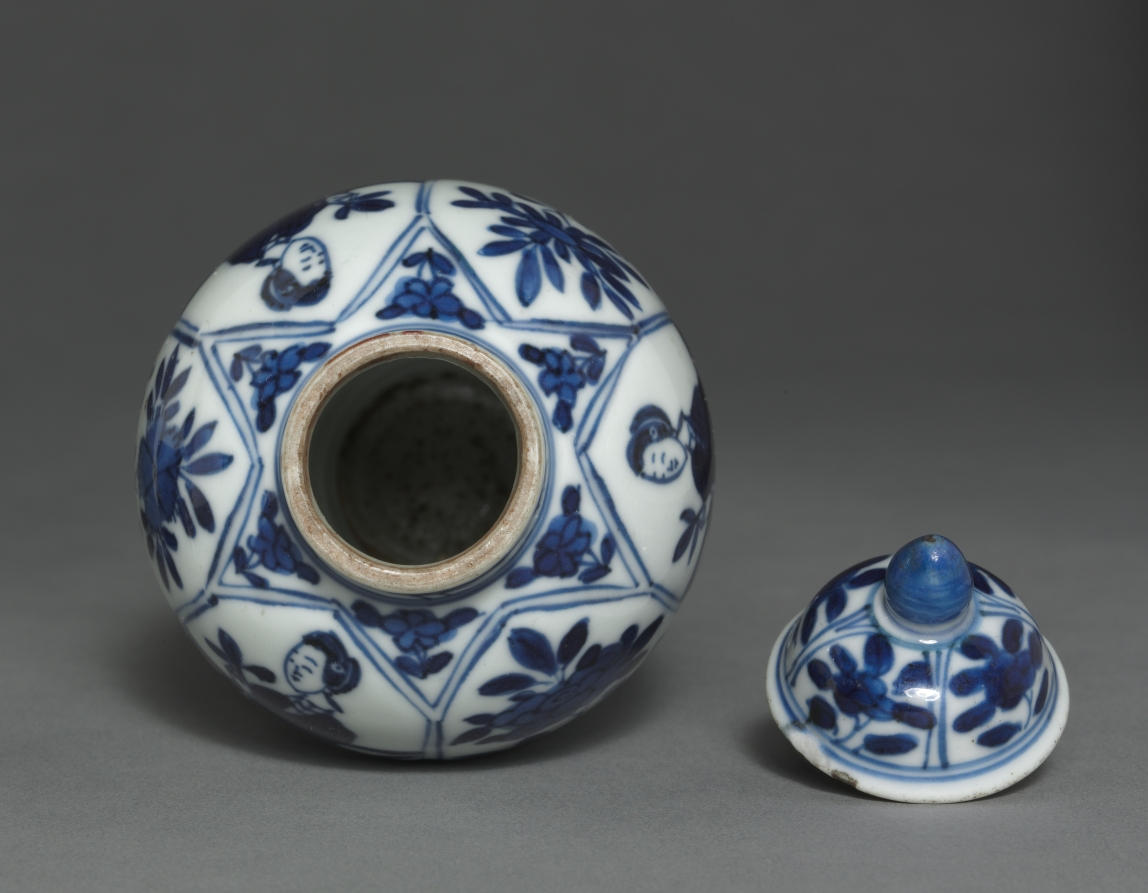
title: Jar with Cover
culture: China, Qing dynasty (1644-1911)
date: 19th Century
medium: porcelain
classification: Ceramic